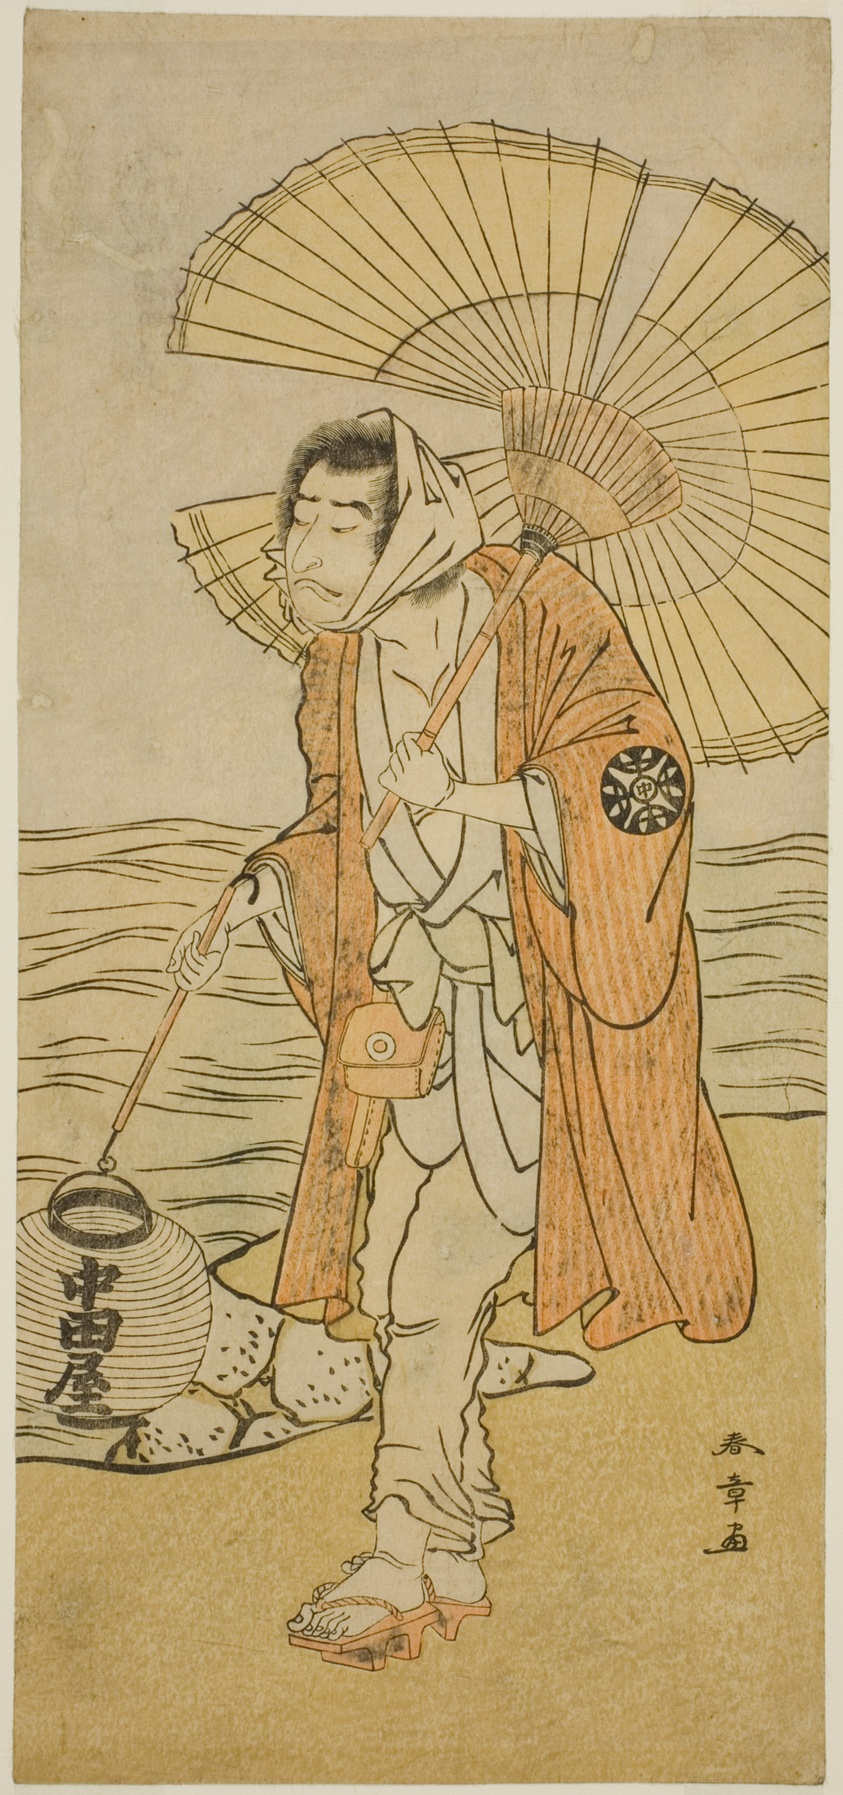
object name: Print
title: The Actor Nakamura Nakazo I as the Renegade Monk Dainichibo in the Play Edo Meisho Midori Soga, Performed at the Morita Theater in the First Month, 1779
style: Japanese (culture or style)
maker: Katsukawa Shunsho 勝川 春章; Japanese, 1726-1792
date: c. 1779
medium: Color woodblock print; hosoban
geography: Japan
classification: woodblock print; print; asian art